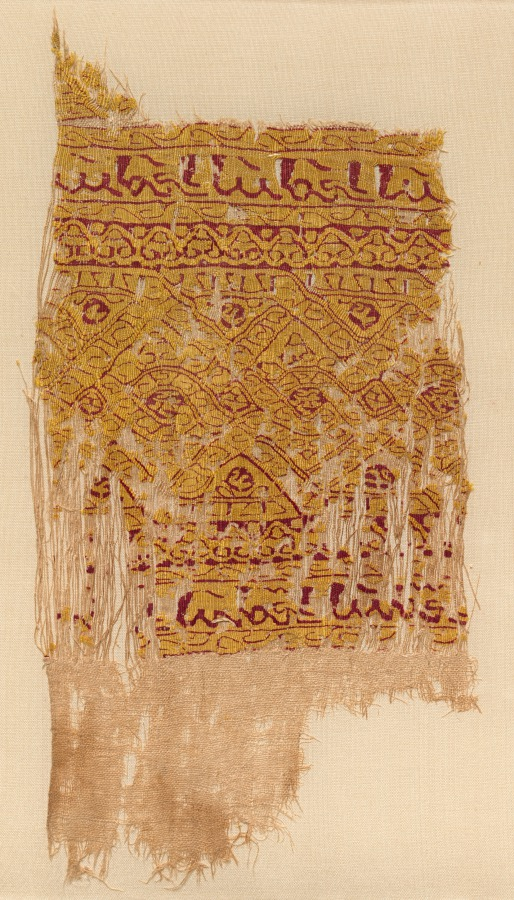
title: Fragment of a Tiraz-Style Textile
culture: Egypt, Fatimid period, Caliphate of al-Hafiz, AH 524-544, 12th Century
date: 1130 – 1149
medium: tabby ground with inwoven tapestry ornament; linen and silk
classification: Textile